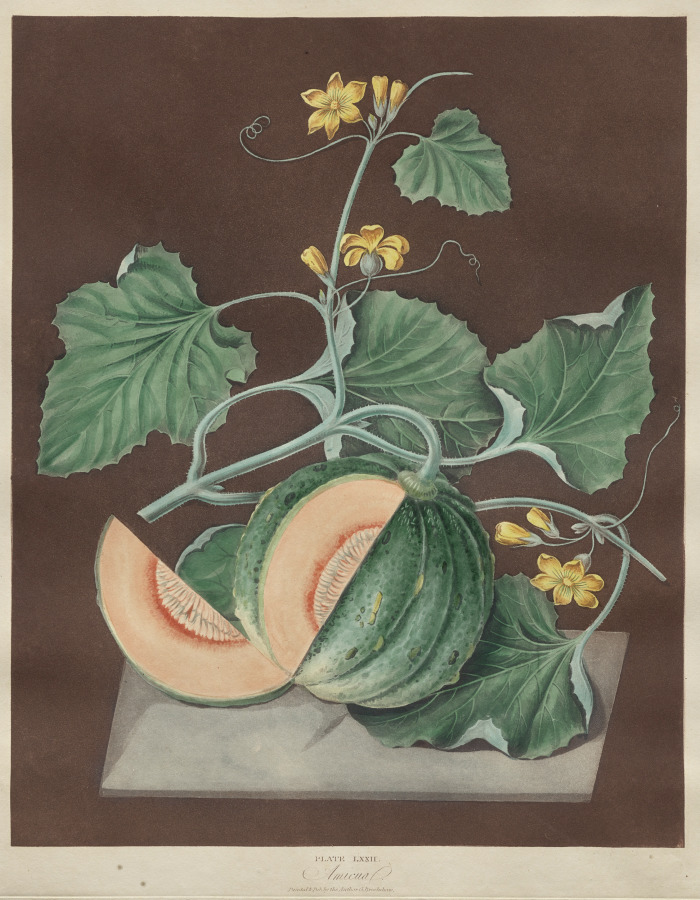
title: Pomona Britannica: No. 72 - Amicua (Melon)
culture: England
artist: George Brookshaw (British, 1751–1823)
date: published 1812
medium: aquatint and stipple engraving printed in color and hand colored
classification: Print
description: This color aquatint etching is one plate from George Brookshaw’s 1812 illustrated volume Pomona Britannica. Named after the Roman goddess of fruit trees, gardens, and orchards, Brookshaw intended the volume to be the English “country gentleman’s” guide to the science of classifying and identifying fruits (pomology). Many of Brookshaw’s models came from the Royal Gardens at Hampton Court and Kensington Gardens. Each print featured one fruit, often life-size, including detailed depictions of its flower and leaves. Printed in color with hand-painted highlights, this and other illustrated botanicals formed an essential part of the cultured English library in the early 19th century.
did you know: Originally from North Africa, melons are recorded in England as early as the 1500s.